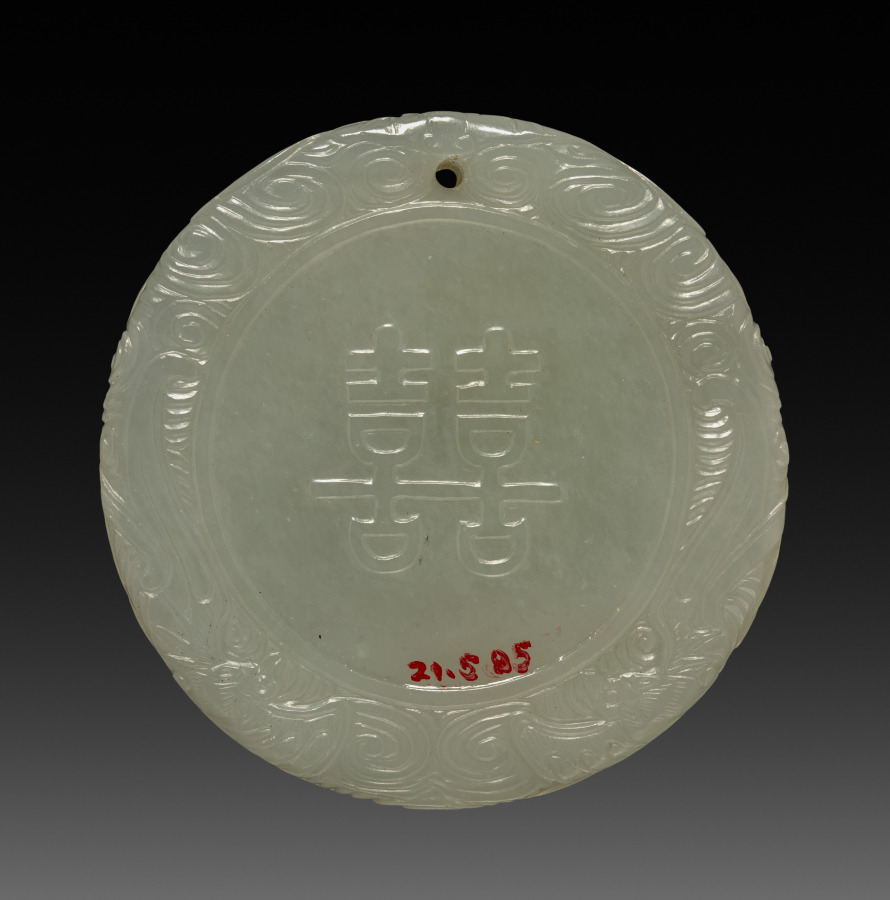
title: Circular Pendant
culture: China, Qing dynasty (1644–1911), Qianlong reign (1736–95)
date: 1735–95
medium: jade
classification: Jade